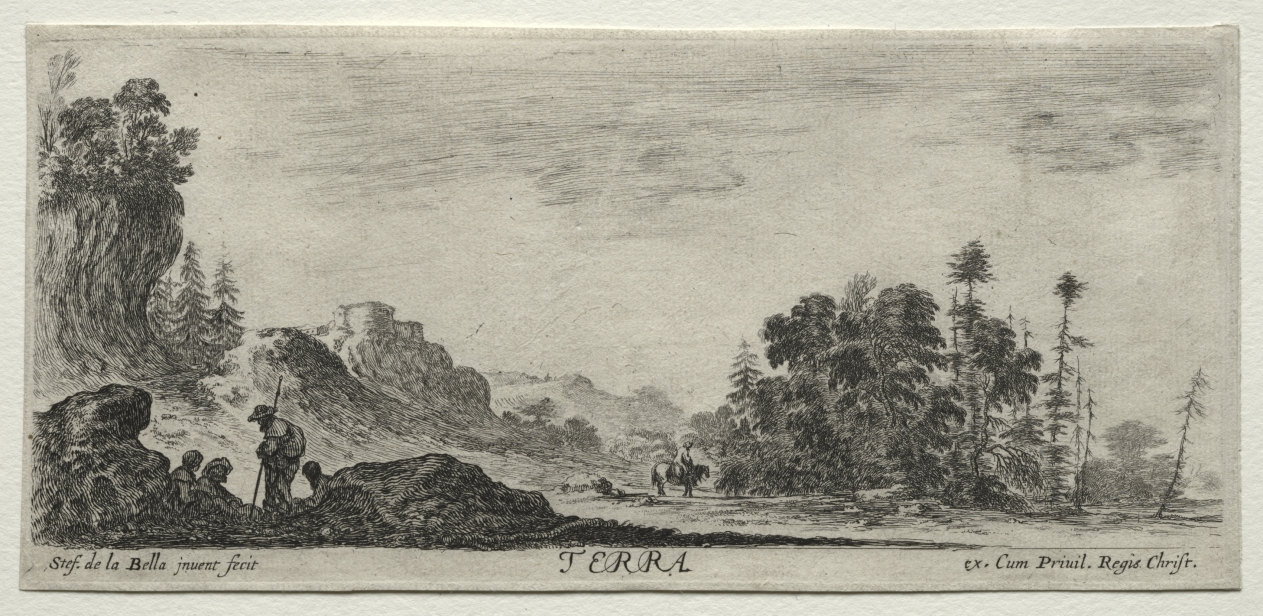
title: The Four Elements: Terra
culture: Italy, 17th century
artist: Stefano Della Bella (Italian, 1610–1664)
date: c. 1648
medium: etching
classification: Print